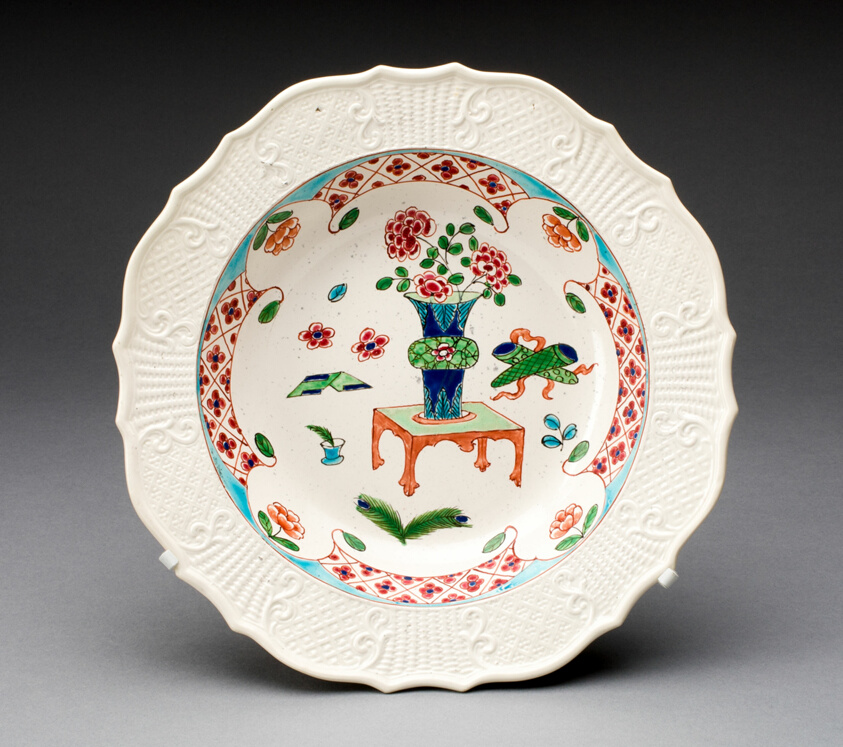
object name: Ceramics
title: Plate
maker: Staffordshire, England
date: 1760/69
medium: Salt-glazed stoneware, polychrome enamels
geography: Staffordshire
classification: plate (general, dish); dish (vessel); european decorative arts; ceramics; stoneware; salt-glazed stoneware